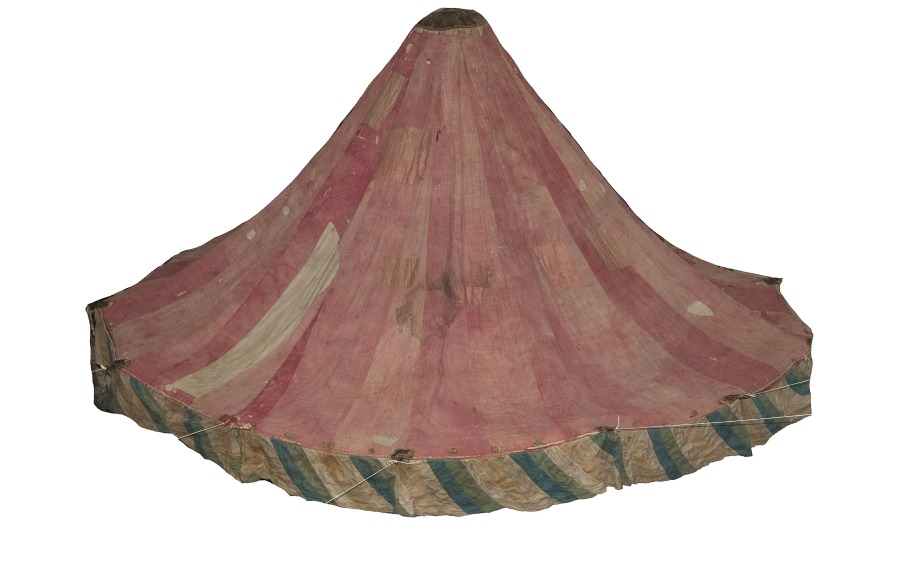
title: Royal Round Tent made for Muhammad Shah (Roof)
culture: Iran, Rasht, Qajar period (1779-1925)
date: 1834–48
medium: Interior: wool: plain weave, inlaid work; silk: embroidery, chain stitch; tape, leather; Exterior: cotton, wool: plain weave; rope, iron ring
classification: Textile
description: Royal tents were potent symbols of authority, wealth, and power throughout the greater Middle East. Rulers owned thousands of tents. They were used for shelter, shade, and innumerable functions in tent compounds that were essential for imperial ceremonies, travel, and military campaigns. Distinguished by size with elaborately decorated interior walls and ceilings, tents could be as large as castles. Opulent tents were also presented as imperial gifts. Tents are only known through documents before 1600. For example, in Baghdad in 809, Caliph Harun al-Rashid owned 4,000 ceremonial tents and 150,000 camping tents that were stored in the imperial Abbasid treasury. An astonishing variety and quantity of tents were housed in the royal Fatimid tent storeroom in Cairo in 1068-69, including "military tents, fortress tents, and castle tents, manufactured of . . . gold-brocaded stuff embroidered with designs of elephants, wild beasts, horses, peacocks, birds." Since 1600, Ottoman Turkish tents with elaborate floral decoration have been preserved in Istanbul in the Topkapi Palace Museum and Military Museum, and in European collections as war booty, primarily from the Ottoman Turks' attempt to conquer Vienna in 1683. These tents are not done in the Rasht technique, but rather are applique. In contrast, royal tents from Iran are extremely rare. This spectacular ceremonial tent is embroidered with the name of its owner, Muhammad Shah, who ruled Iran from 1834 to 1848 during the Qajar dynasty. The radiant jewellike interior features exuberant flora, blossoming vines, and robust birds made with colored wool embellished with silk-thread embroidery.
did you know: Rasht work is named after the city on the Caspian Sea in present-day Iran, which was a major silk trade center with numerous textile workshops.